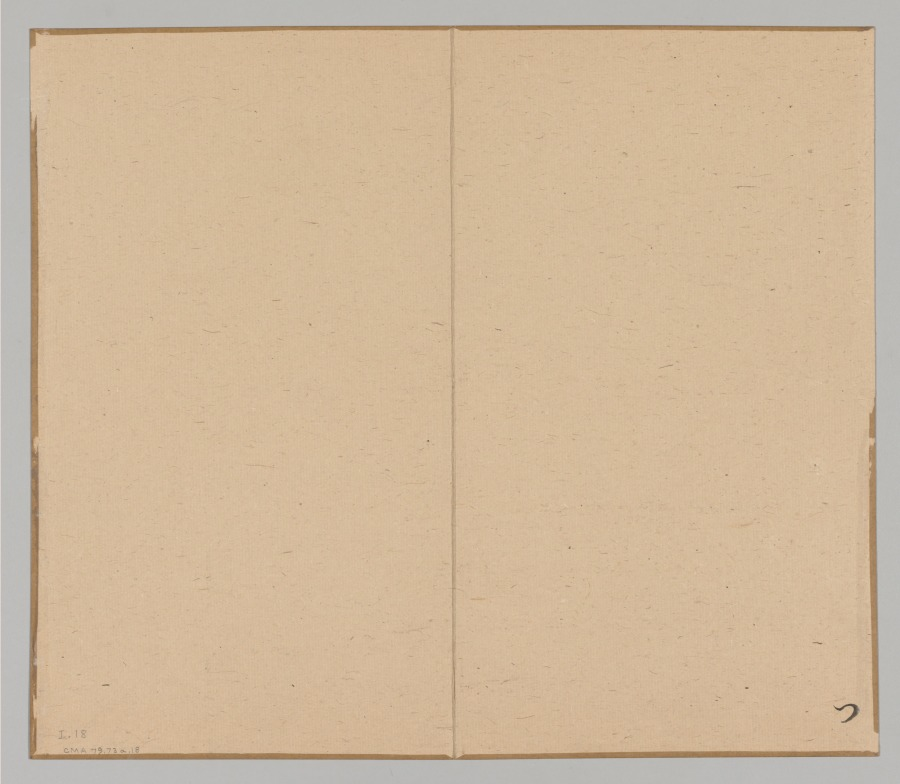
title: Reverberations of Taiga, Volume 1 (leaf 18)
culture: Japan, Edo period (1615–1868)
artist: Aoki Shukuya (Japanese, d. 1802)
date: mid- to late 1700s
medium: double-leaf from a pair of albums; ink and light color on paper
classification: Portfolio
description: Traditionally, young painters in Japan began their studies with an established master-painter. The master's compositions invariably became models that the apprentice copied to learn various ink and brush techniques. Shukuya was a pupil of the famous Kyoto artist Ikeno Taiga, whose style is reflected in these sketches of rocks, trees, and mountains.